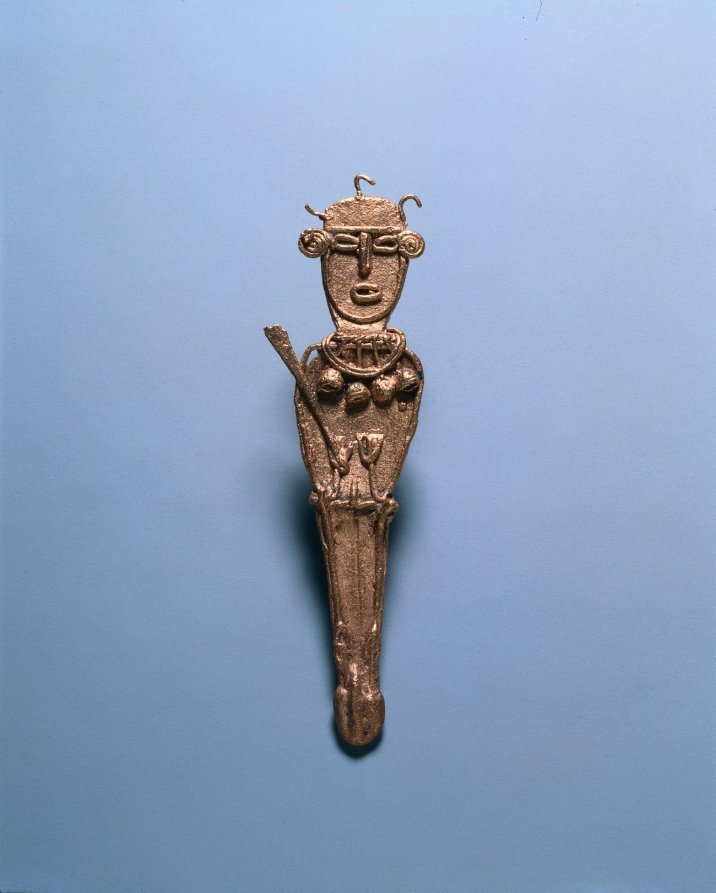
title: Tunjos (Votive Offering Figurine)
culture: Colombia, Muisca style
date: c. 900–1550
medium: cast gold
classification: Metalwork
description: Unlike the other gold ornaments made in the isthmian region, tunjos were not worn; instead, they served as offerings that were deposited in sacred places such as lagoons and caves. They often depict humans who hold something. Perhaps because they were not meant for display, tunjos were not finished after lost-wax casting. Flaws remain uncorrected, surfaces are unpolished, and gold that backed into the channel used to pour the molten metal into the mold was left in place.